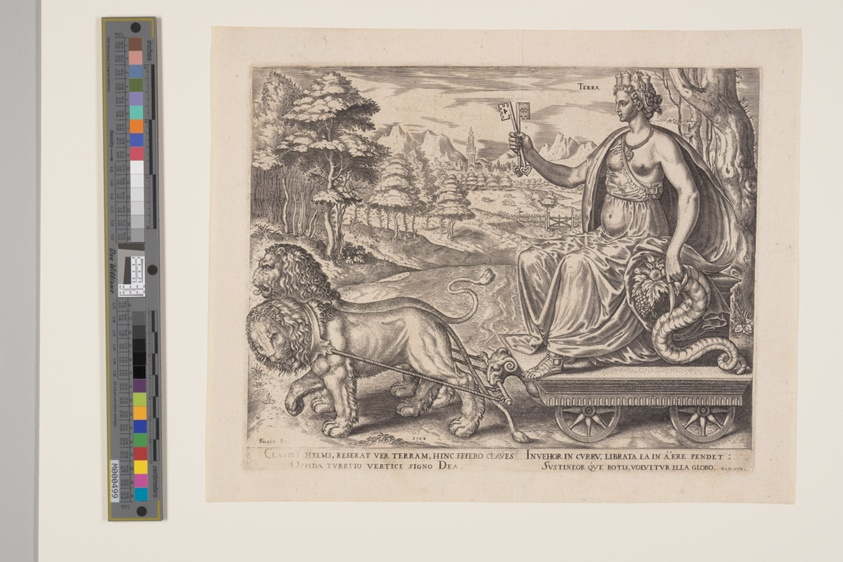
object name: Print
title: Earth, from The Four Elements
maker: Philip Galle; Flemish, 1537–1612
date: 1564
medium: Engraving on ivory laid paper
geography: Flanders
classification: engraving; paper; print; prints and drawing